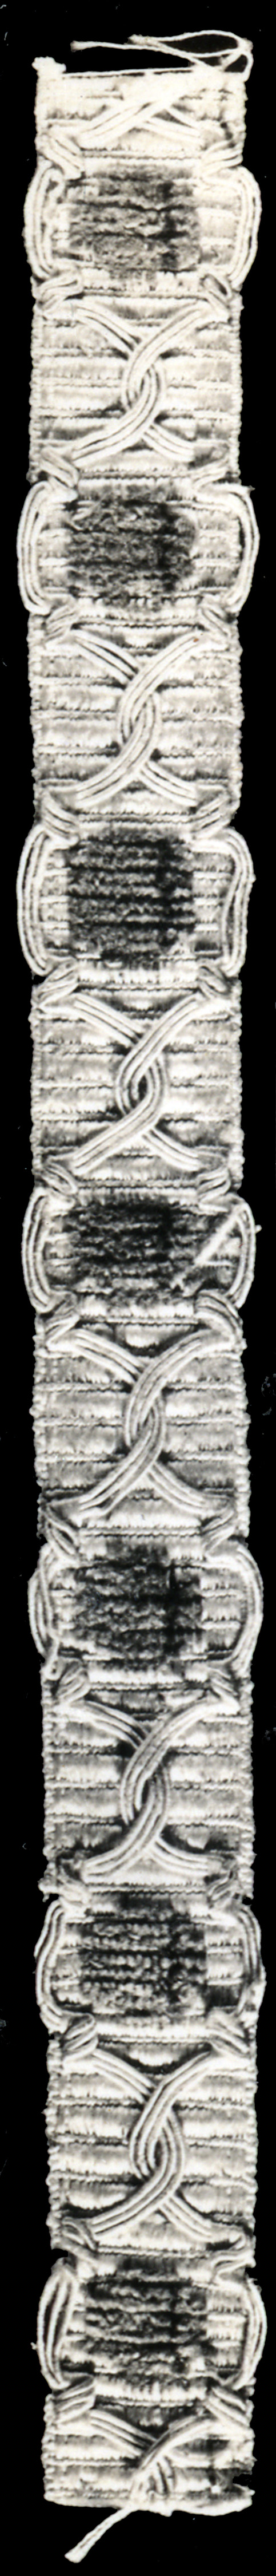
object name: Textile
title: Galloon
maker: Italy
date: 18th century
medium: velvet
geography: Italy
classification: textile; weaving